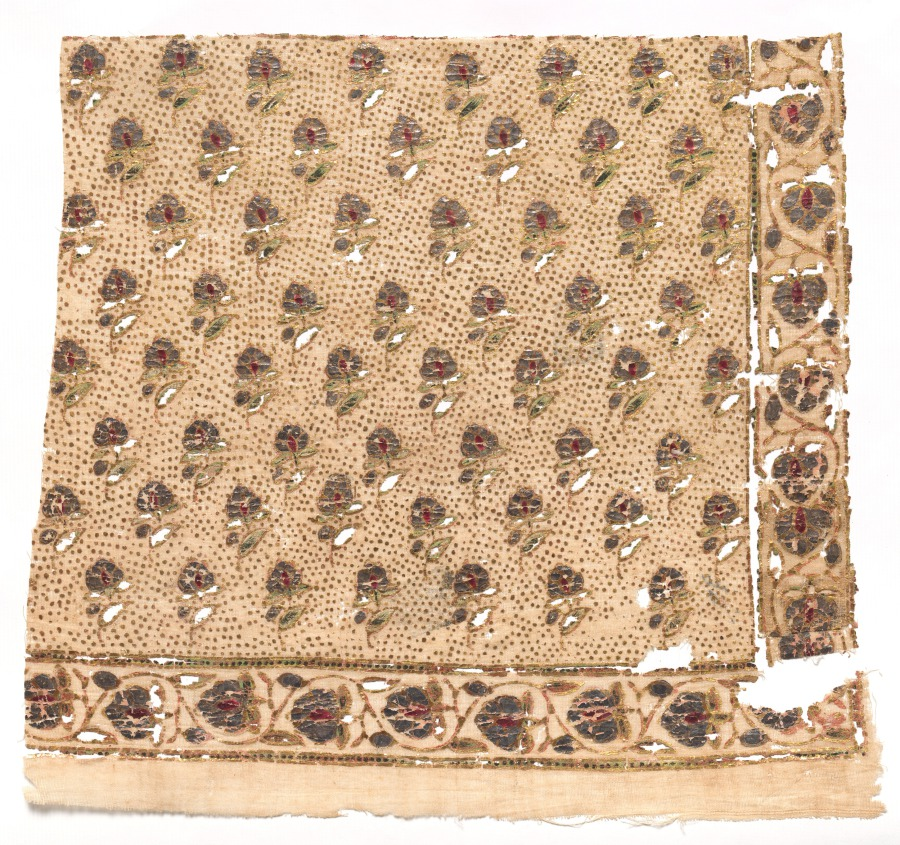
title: Fragment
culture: India, Rajasthan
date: 1800s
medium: Block printed and overprinted with gold and silver leaf (varak) and overpainted with pigments on plain weave cotton muslin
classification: Textile